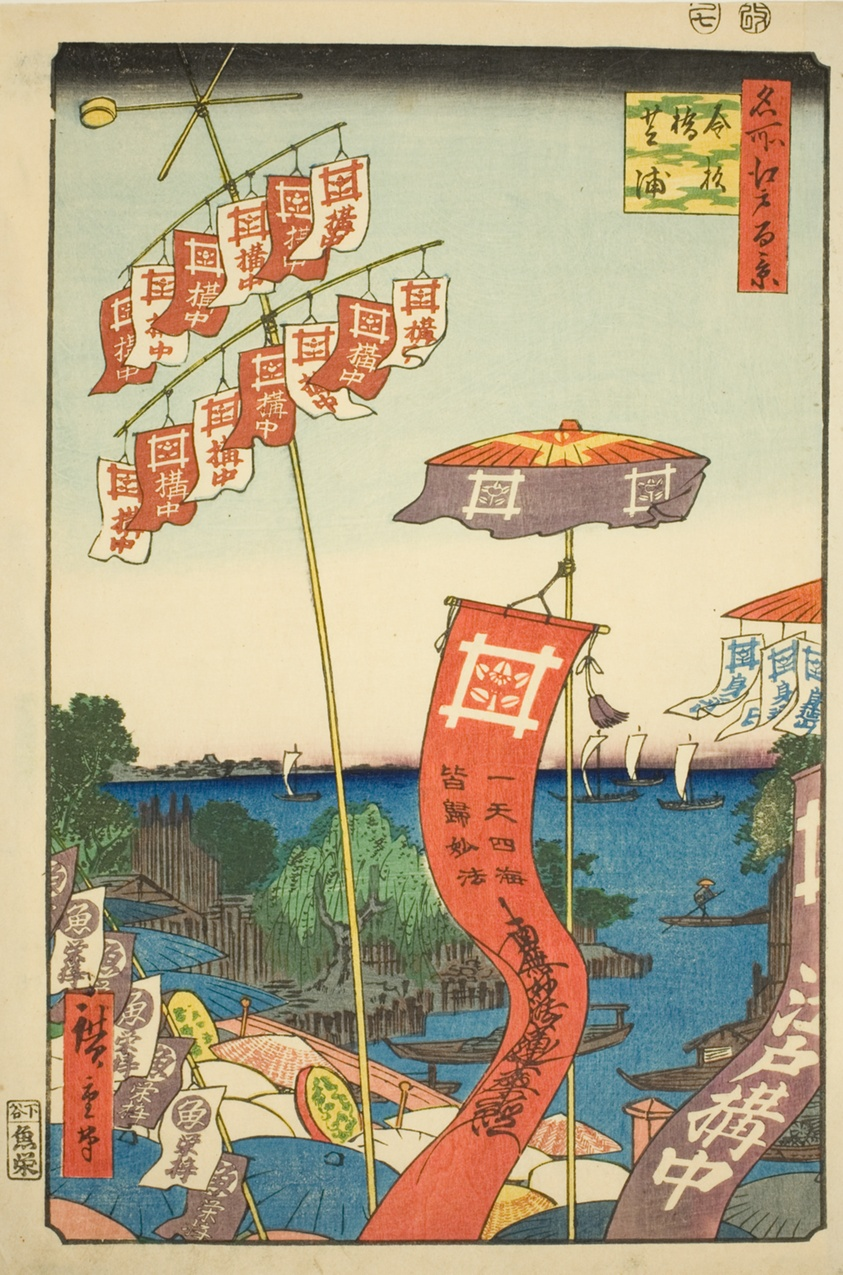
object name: Print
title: Kanasugi Bridge at Shibaura (Kanasugibashi Shibaura), from the series "One Hundred Famous Views of Edo (Meisho Edo hyakkei)"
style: Japanese (culture or style)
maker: Utagawa Hiroshige 歌川 広重; Japanese, 1797-1858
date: 1857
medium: Color woodblock print; oban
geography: Japan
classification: woodblock print; print; asian art